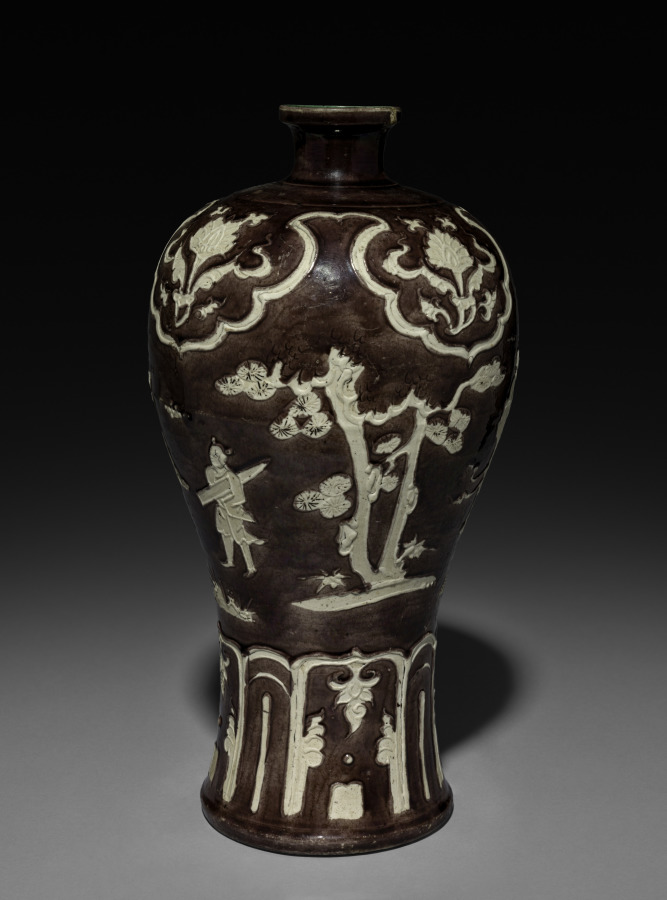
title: Vase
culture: China, Jiangxi Province, Ming dynasty (1368–1644)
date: late 1400s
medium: porcelain, Fahua ware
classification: Ceramic